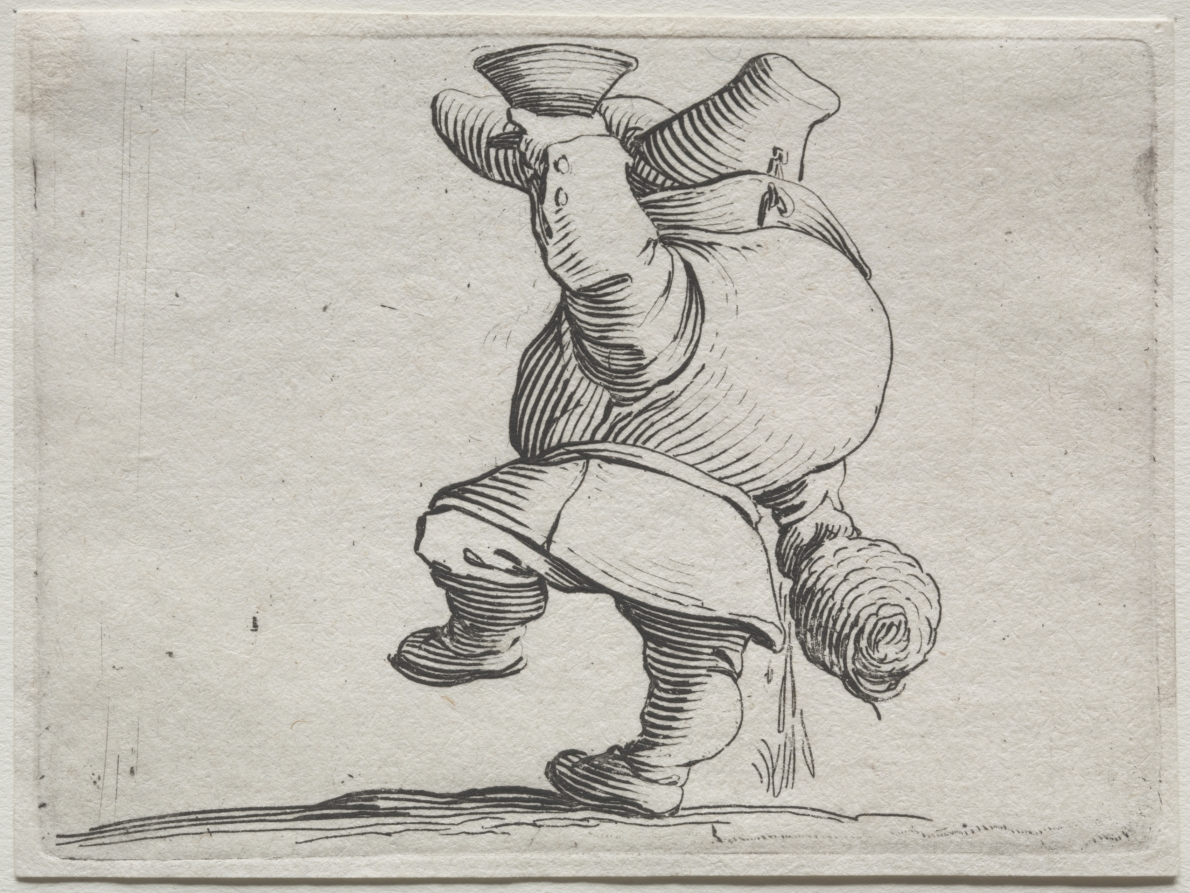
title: Drinker Seen From Behind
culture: France, 17th century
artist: Jacques Callot (French, 1592–1635)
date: c. 1621–25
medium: etching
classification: Print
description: This image was published by Callot in 1621 as part of a series of 21 prints depicting gobbi (people with curved backs). The series was titled Varie figure gobbi di Jacopo Callot fatto in Firenza l'anno 1616 (Various hunchbacks by Jacopo Callot, made in Florence in 1616). The figures in the series are reminiscent of character tropes that were popular in the theatrical genre known as the commedia dell’arte (comedy of the profession). As the name suggests, the comedy of this genre was predicated on the assumption that the viewer occupied a different social class than the characters depicted. This figure's distorted physique and drunken dance would have suggested to contemporary audiences that he is inherently flawed in both body and mind.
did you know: This figure is raising his cup in one hand and holding a bottle with the other. Both the bulbous shape of the bottle and its basketlike encasement suggest that it is made of glass, which was newly introduced for the storage of wine in the 1600s.